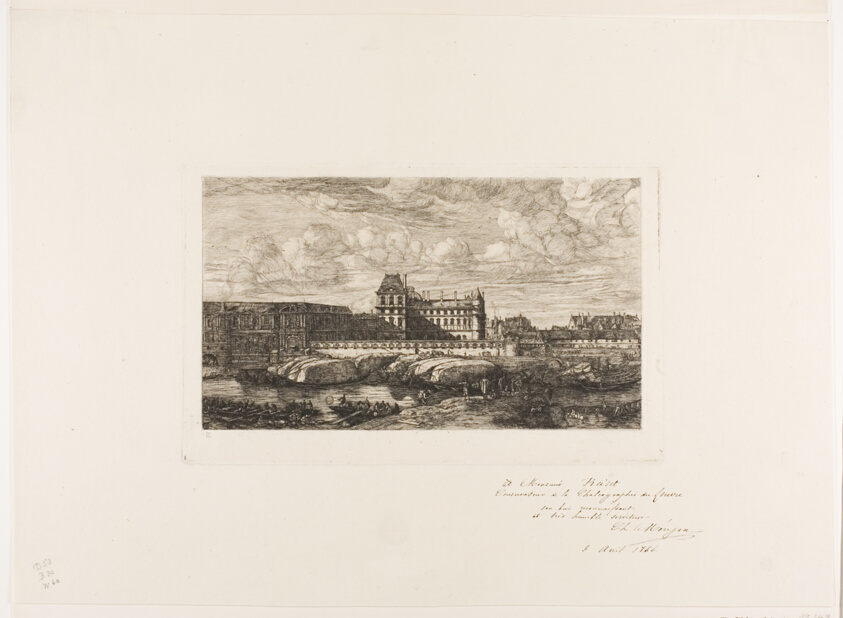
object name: Print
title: The Old Louvre, Paris, 1651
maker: Charles Meryon (French, 1821-1868); after Reinier Nooms (Dutch, c. 1623-c. 1664); published by Chalcographic Society of the Louvre (French, 19th century)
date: 1865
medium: Etching on ivory laid paper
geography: France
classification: etching; print; prints and drawing